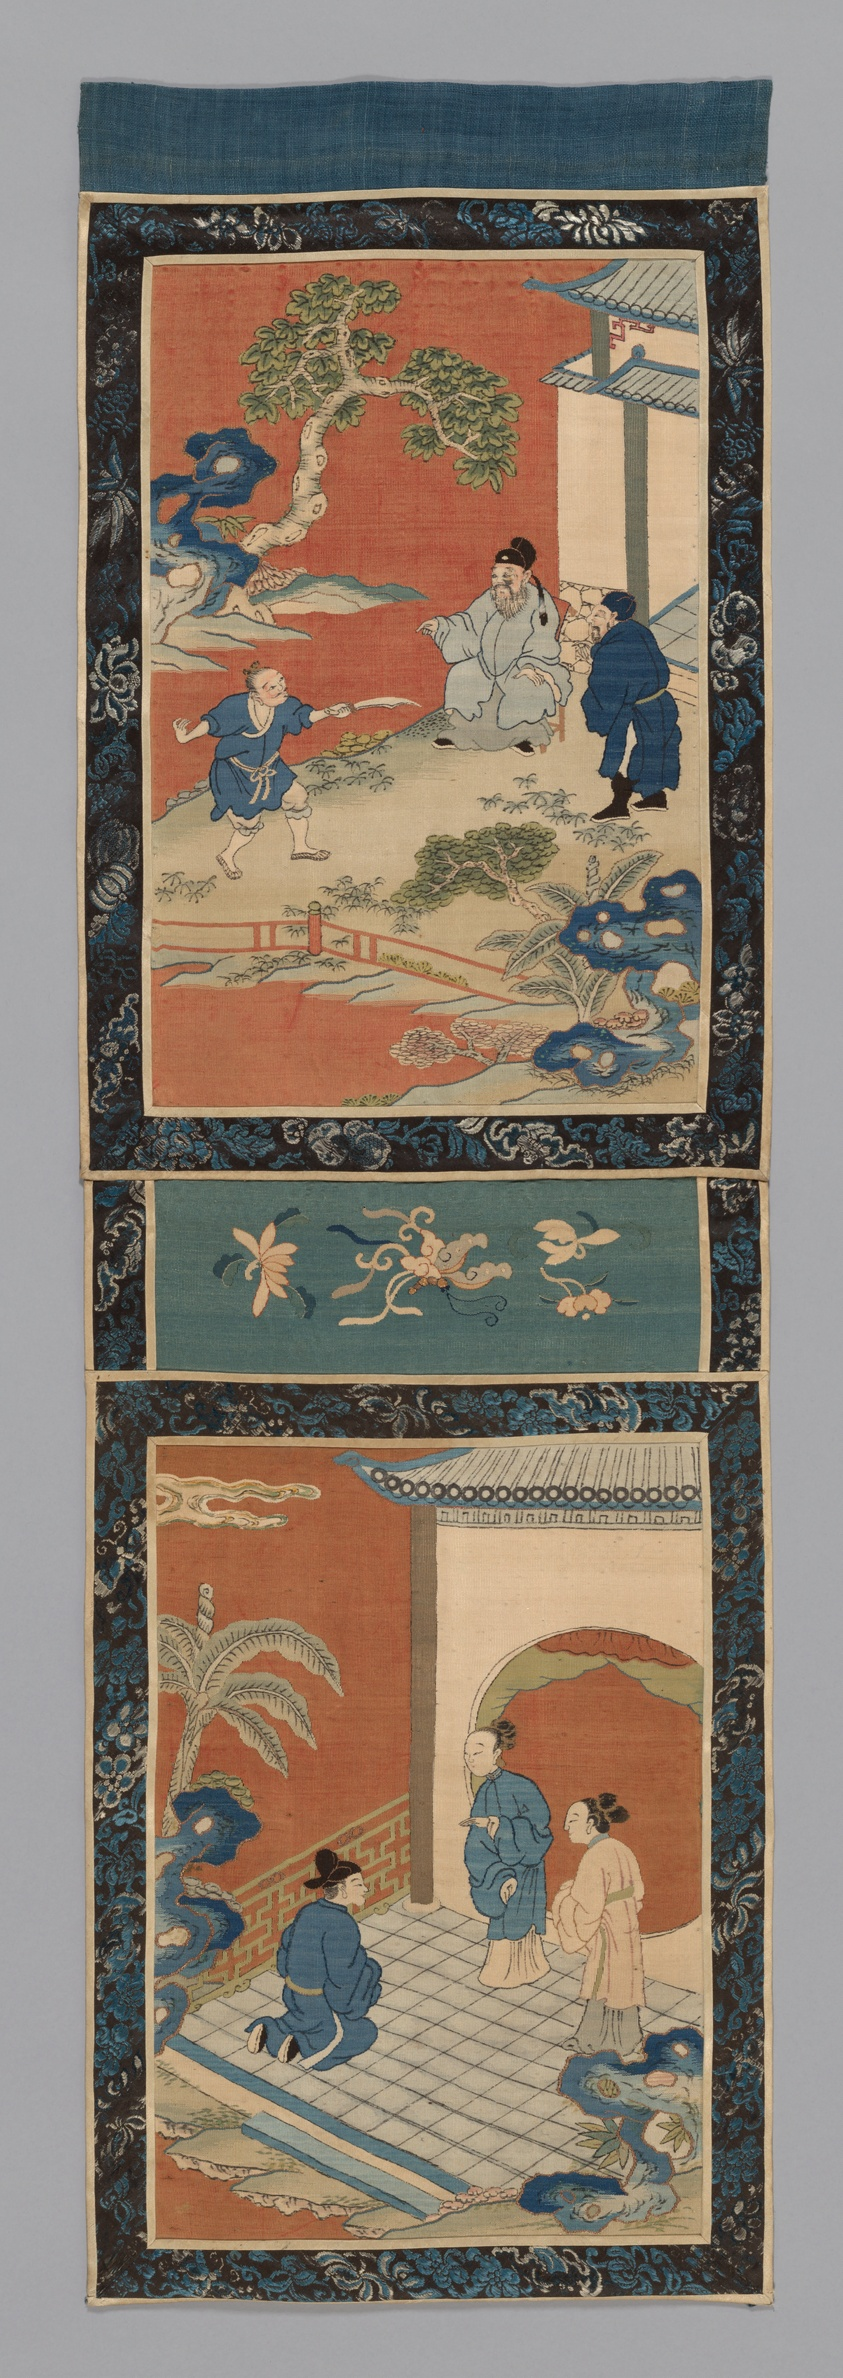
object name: Textile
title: Panel (For a Screen)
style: qing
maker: China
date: Qing dynasty (1644–1911), 1875/1900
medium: Silk and gold-leaf-over-lacquered-paper-strip-wrapped silk, slit tapestry weaves; painted details; border: silk, warp-float faced 7:1 satin weave with supplementary patterning wefts; inner and outer edges: silk, warp-float faced 4:1 satin weave; lined with linen, plain weave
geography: China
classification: textile; weaving